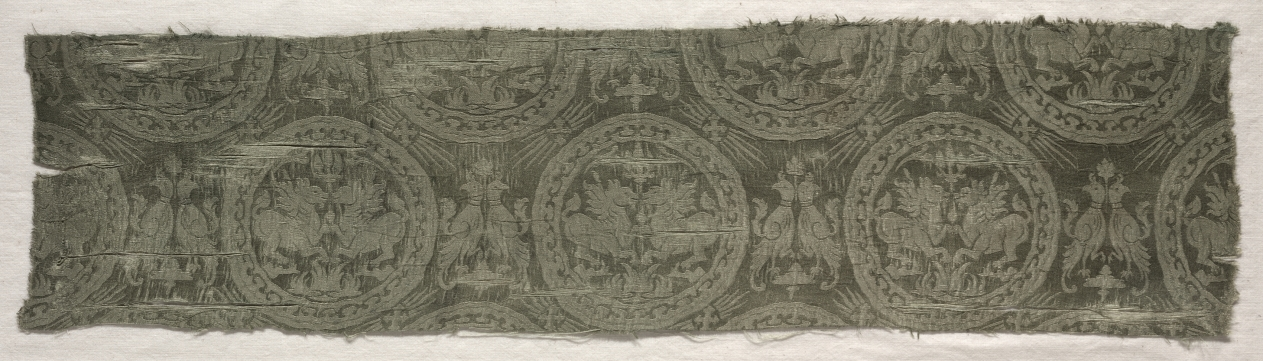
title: Textile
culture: France, late 19th century or early 20th century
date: late 1800s or early 1900s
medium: satin damask; silk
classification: Textile